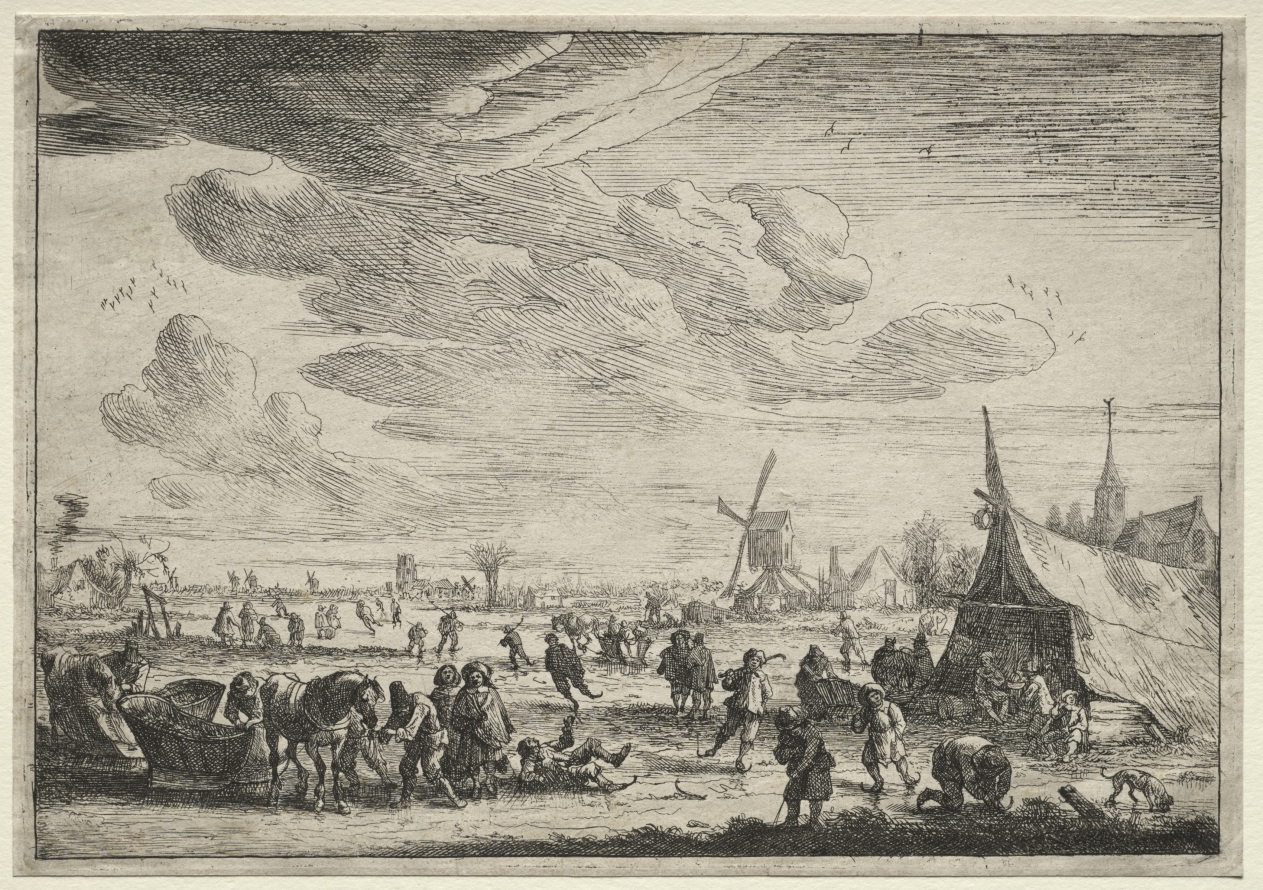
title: The Skaters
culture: Flanders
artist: Peeter Bout (Flemish, 1658–1719)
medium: etching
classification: Print